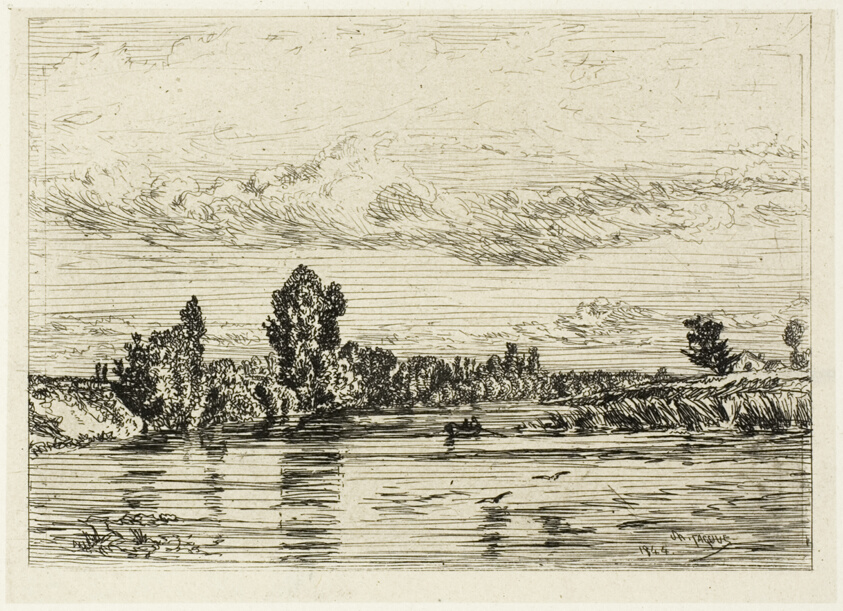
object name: Print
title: Landscape Near Asnières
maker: Charles Émile Jacque (French, 1813-1894)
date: 1844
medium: Etching and drypoint on light gray China paper laid down on ivory wove paper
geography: France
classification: etching; print; prints and drawing